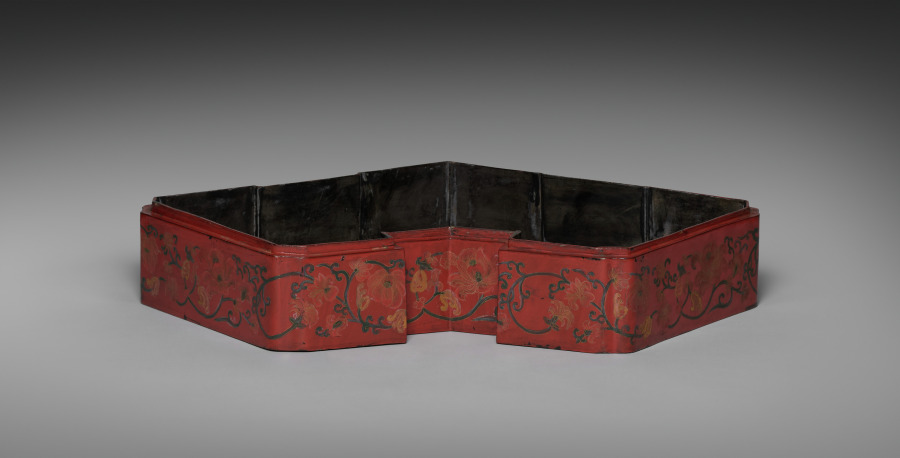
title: Upper Tier Box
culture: Japan, Edo period (1615–1868)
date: late 1700s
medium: red lacquer over a wood core, with litharge painting and engraved gold designs (Ryukyuan)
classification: Lacquer